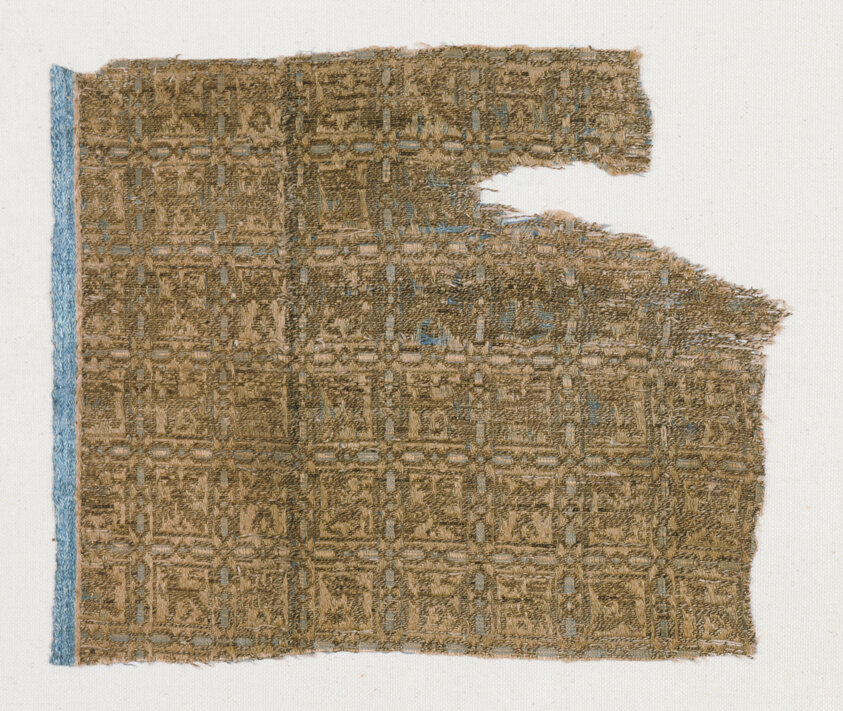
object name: Textile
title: Fragment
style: european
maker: Middle East or Spain or Italy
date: 14th century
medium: Silk and gilt-animal-substrate-wrapped linen, warp-float faced 4:1 satin weave with plain interlacings of secondary binding warps, supplementary patterning wefts and self-patterned ground wefts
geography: Italy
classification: textile; weaving